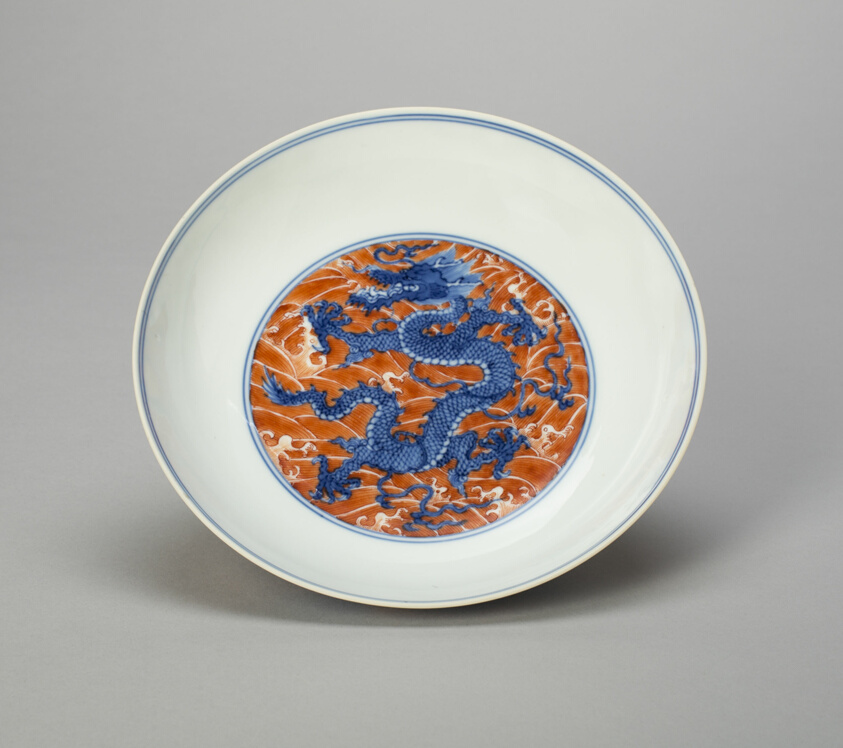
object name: Vessel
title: Dish with Dragon Writhing amid Waves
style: Chinese (culture or style)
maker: China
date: Qing dynasty (1644–1911), Kangxi reign mark and period (1662–1722)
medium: Porcelain painted in underglaze blue and overglaze enamel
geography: China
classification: dish (vessel); porcelain; asian art; ceramics; vessel